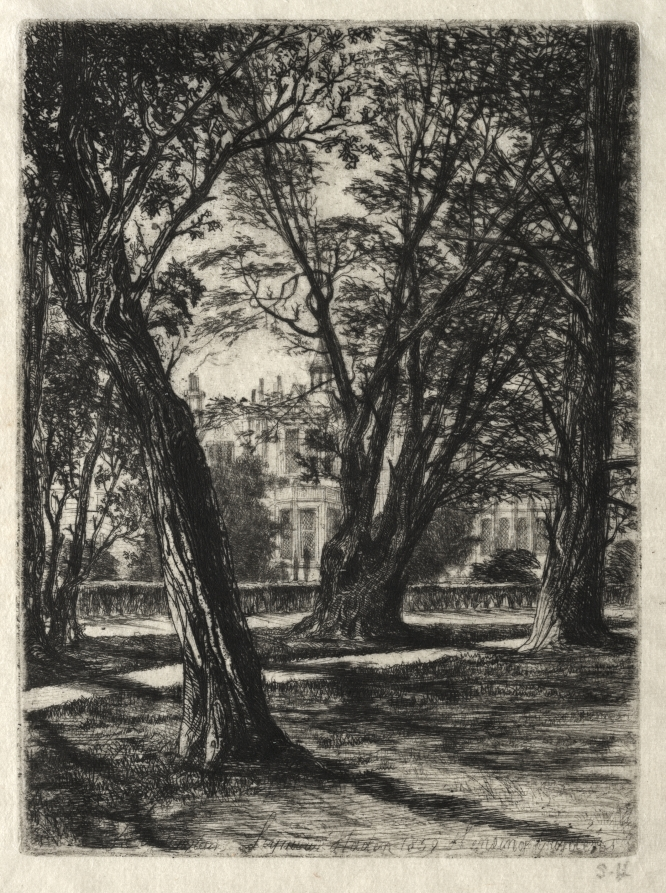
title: Kensington Gardens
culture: England, 19th century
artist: Francis Seymour Haden (British, 1818–1910)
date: 1859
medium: etching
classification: Print